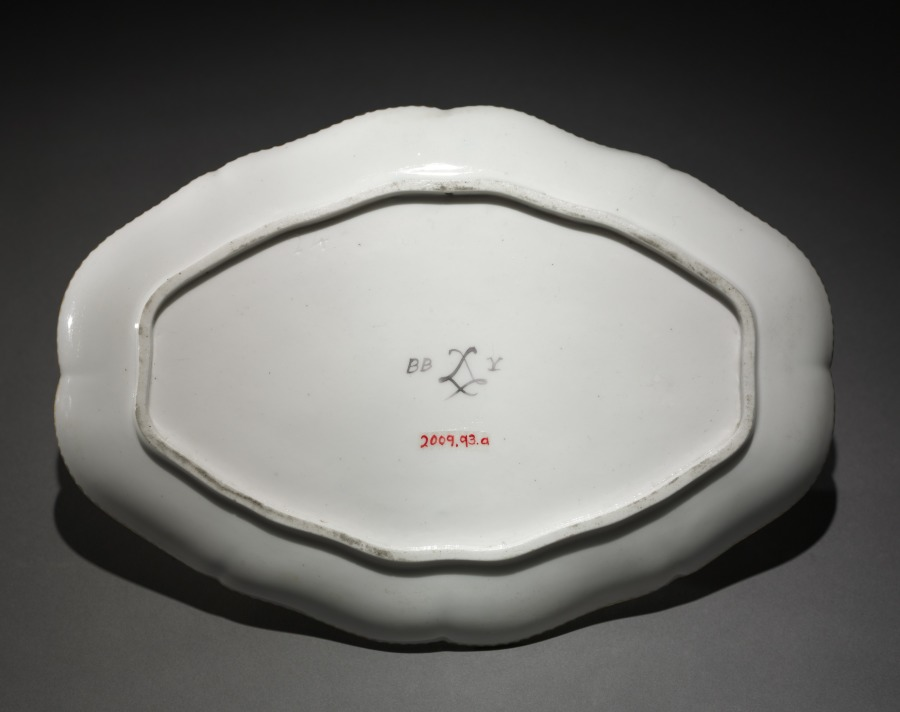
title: Jam Pots on Stand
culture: France, 18th century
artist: Sèvres Porcelain Factory (French, est. 1756)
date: c. 1760's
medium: porcelain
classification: Ceramic